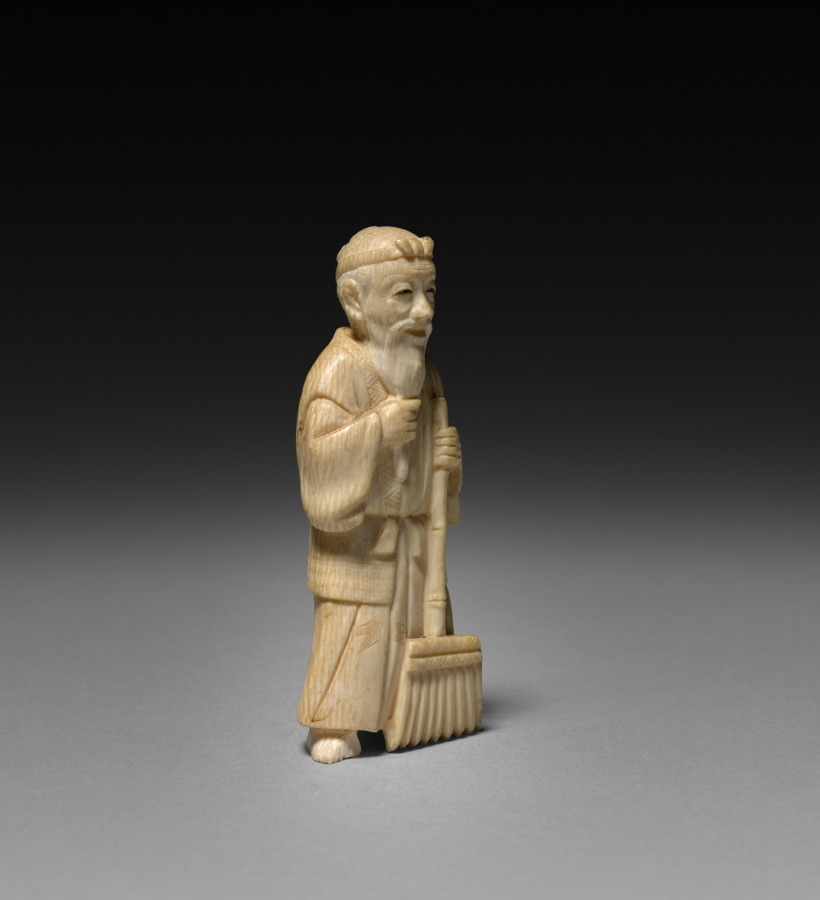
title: Japanese Man with Rake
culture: Japan, Meiji period (1868–1912)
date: early 1900s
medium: ivory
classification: Ivory